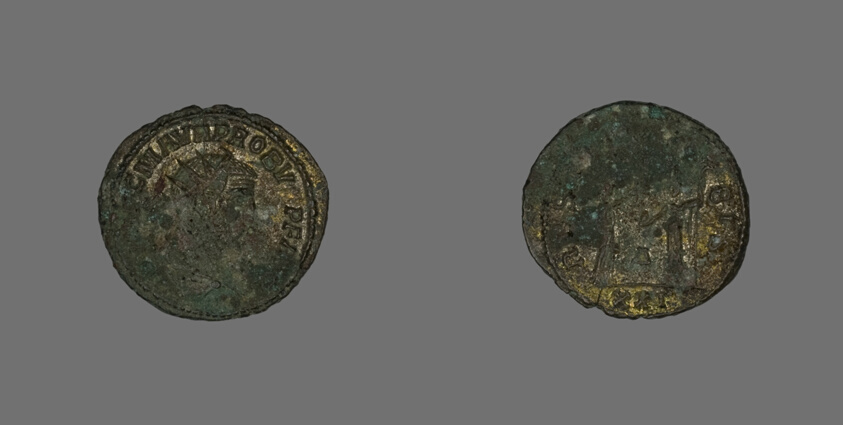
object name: Coin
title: Antoninianus (Coin) Portraying Emperor Probus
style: roman (ancient, style or period), ancient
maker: Roman; minted in Antioch (near modern Antakya, Turkey)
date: 276-282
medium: Billon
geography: Roman Empire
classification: coin; ancient art